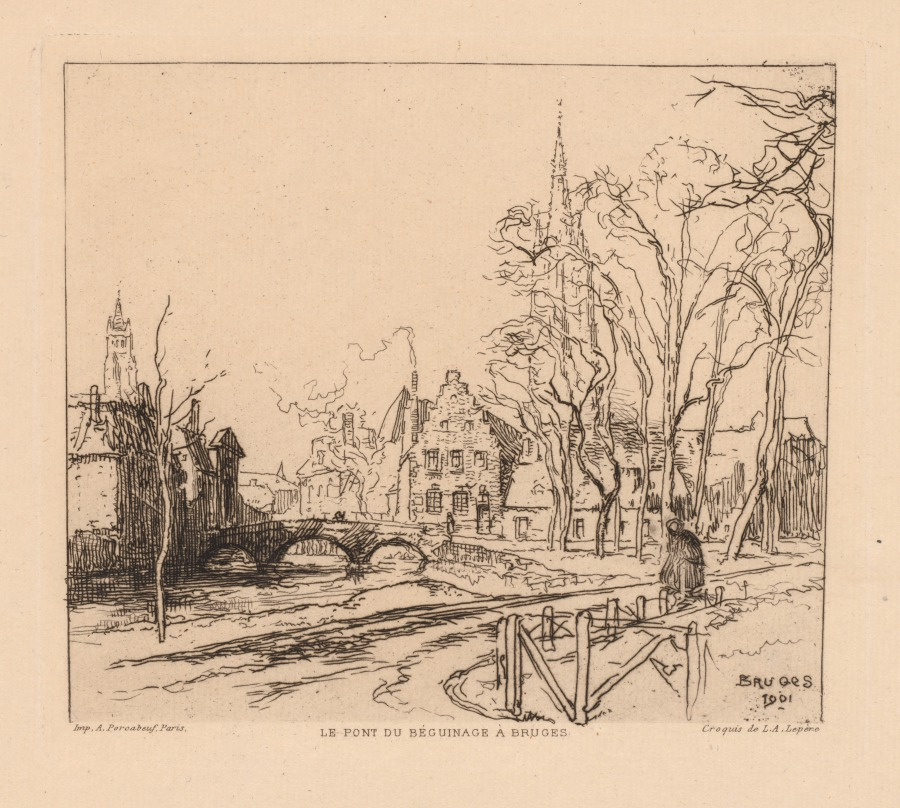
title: The Béguinage Bridge in Bruges (La Pont du Beguinage à Bruges)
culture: France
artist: Auguste Louis Lepère (French, 1849–1918)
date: 1901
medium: etching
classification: Print